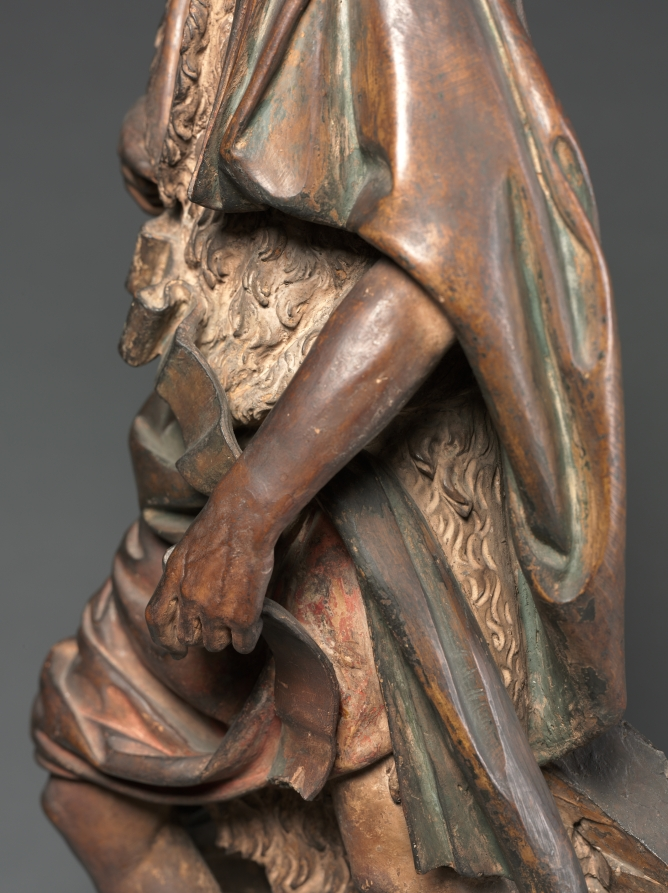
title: Saint John the Baptist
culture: Italy, Florence, 16th century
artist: Master of the Saint John Statuettes (Italian)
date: c. 1500–1525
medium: terracotta with traces of polychromy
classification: Sculpture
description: This statuette belongs to a group of terracotta sculptures representing David (from the OldTestament) and Saint John (from the New Testament) produced by a still unidentified Florentine artist and his studio in the late 1400s and early 1500s. Giventheir scale, it seems likely that these sculptures were intended for use in private homes rather than churches.